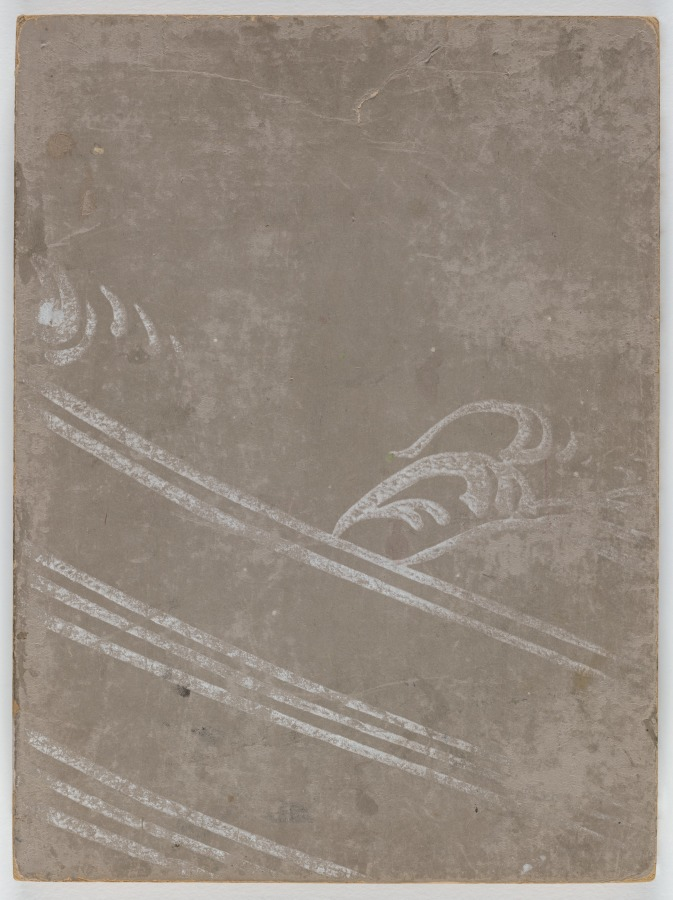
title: Flowers of a Hundred Worlds (Momoyogusa), Vol. 1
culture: Japan, Meiji period (1868–1912)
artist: Kamisaka Sekka (Japanese, 1866–1942)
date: 1909–10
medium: one of a set of three woodblock-printed folding-books; ink, color, gold, and silver on paper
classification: Bound Volume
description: This is the first of a set of three woodblock printed albums by Kamisaka Sekka, the artist considered the last major exponent of the Rinpa style of painting and design associated with the artists Tawaraya Sōtatsu (died about 1640) and Ogata Kōrin (1658-1716). Momoyogusa, in addition to meaning "flowers of a hundred worlds," is a classical name for the chrysanthemum. It appears in a poem by Mimube no Tarukuni (dates unknown) written in 755 and contained in the first Japanese imperial poetry anthology, Collection of Ten Thousand Leaves (Man'yōshū). In the poem, Tarukuni, who was posted in northern Kyushu as a guard at the time, asked a missed beloved in his home province to be well for a hundred nights, like the chrysanthemums growing in his parents' garden. Chrysanthemums are traditionally associated with longevity, and in some cases immortality. This volume of Sekka's series includes a preface poem by the Kyoto-based physician and poet Sugawa Nobuyuki (1839-1917) that may be glossed as follows: As we move forward in the spirit of the new age, "flowers of a hundred worlds" sown by seed, now blossom in distinctive colors and scents (translation by John T. Carpenter)